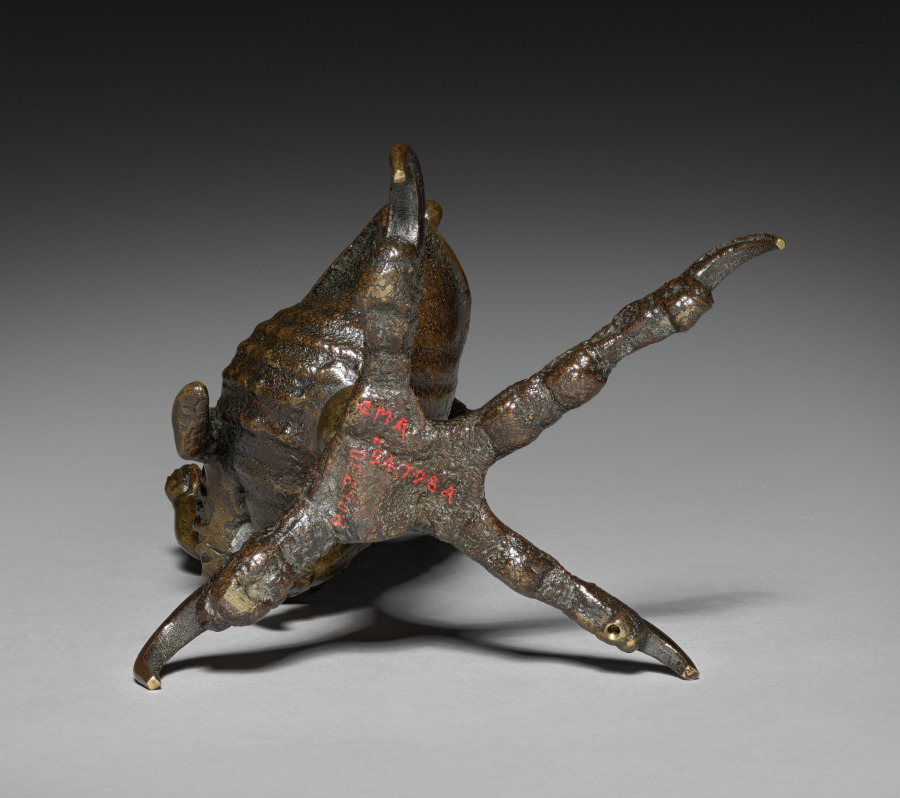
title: Inkwell and Candlestick with the Infant Hercules Killing the Serpents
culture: Italy, Ravenna, 16th century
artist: workshop of Severo da Ravenna (Italian, c.1496–c.1543)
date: c. 1510–20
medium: bronze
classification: Sculpture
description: In the early 1500s, Padua, a center of strong humanist traditions, encouraged the revival of classicism, and artists took their cues from descriptions in the works of classical authors. Classical small-scale bronzes grew in demand, and in response, the city's bourgeoning foundries produced a varied and extensive supply of small statues. Like many early Paduan bronzes, this work's utilitarian function—used to hold ink and to supply light—is complimented by its ornamental value. The base consists of an eagle claw, cast from life, supporting an equally realistic nautilus shell. Though medieval artists had occasionally used seashells to hold paints, the shell inkwell, whose small size makes it rather impractical to use, was a motif particular to Padua. Perched upon the shell is most likely Hercules, the son of Zeus. Perhaps aided by a staff (now missing) he is poised to strike a serpent, which according to myth was sent by Hera, the jealous wife of Zeus, to kill him. The dramatic opposition of hero and monster enhances the connection to the classical past, further meeting the desires of the educated patrons of Padua.